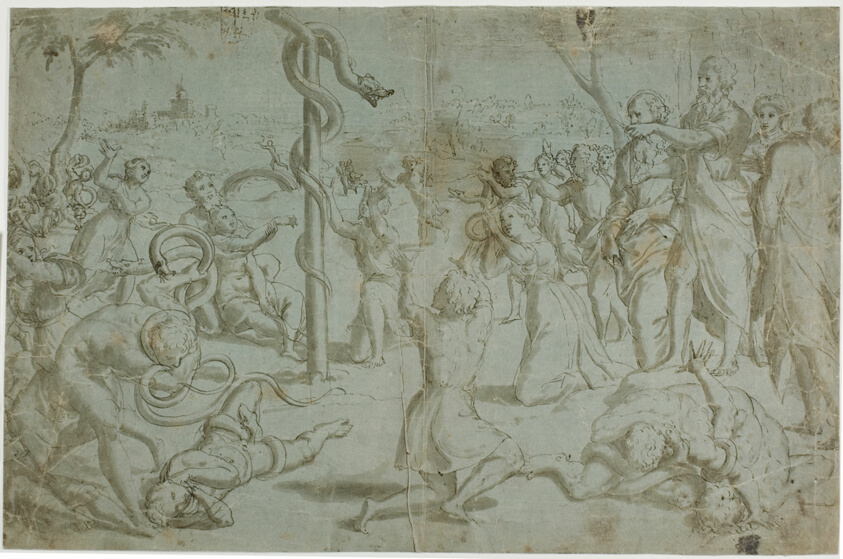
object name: Drawing and Watercolor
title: Moses and the Brazen Serpent (recto); Ornamental Base (verso)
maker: Recto attributed to Tommaso Vincidor (Italian, died c. 1536); Verso by Unknown Artist (Italian, 17th century)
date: 1530 (recto); 1600/99 (verso)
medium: Pen and brown ink with brush and gray wash, on cream laid paper prepared with blue wash (recto), and pen and brown ink with brush and brown wash over graphite on cream paper laid down on cream laid paper (verso)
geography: Italy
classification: ink with wash; drawings (visual works); prints and drawing